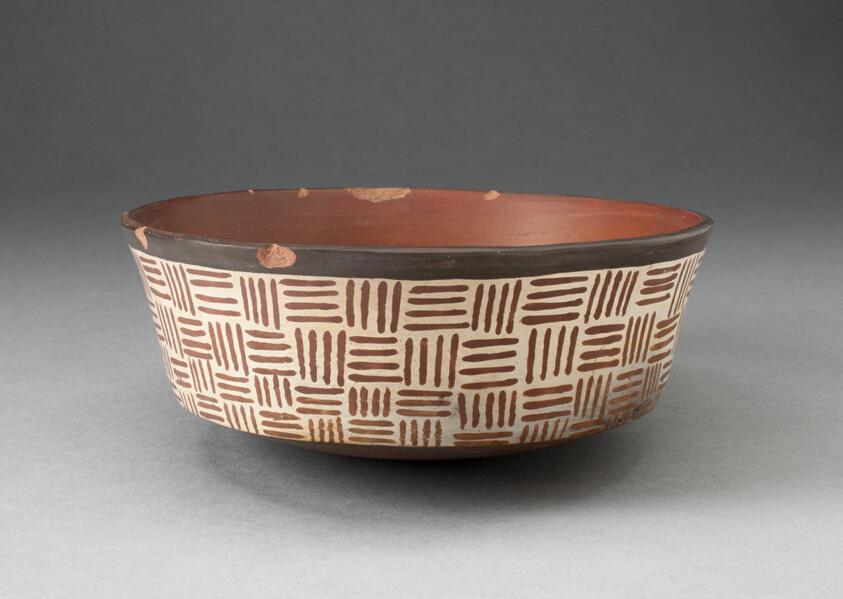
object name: Vessel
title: One of a Pair of Bowls with Textile-Like Pattern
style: nazca, early intermediate period, Pre-Columbian, americas, Arts of the Americas, andean, andes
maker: Nazca; South coast, Peru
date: 180 BCE–500 CE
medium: Ceramic and pigment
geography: Peru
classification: earthenware; art of the americas; ceramics; vessel